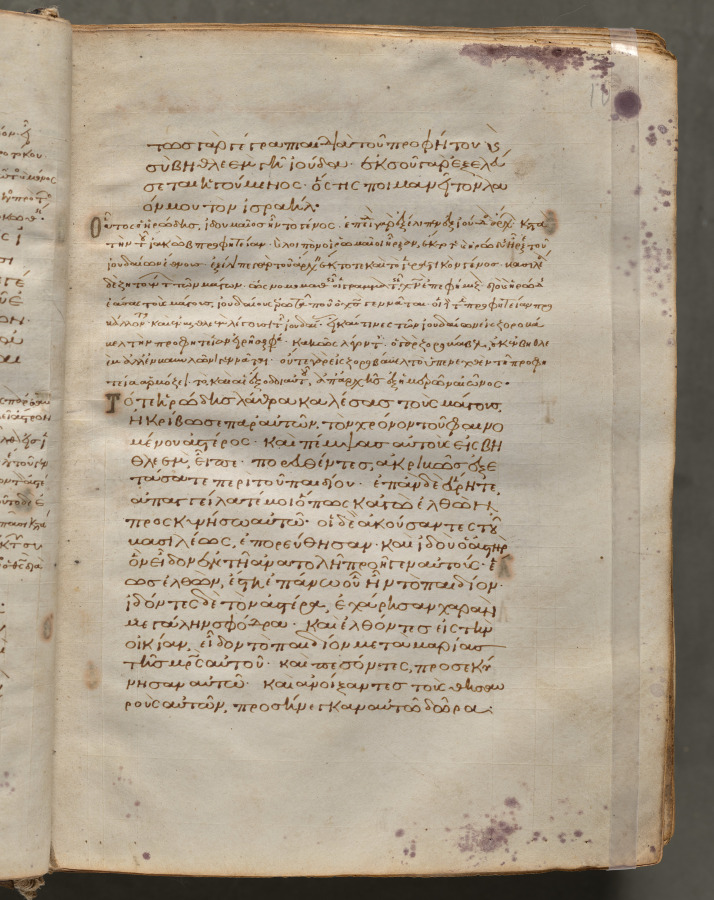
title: Text, folio 10 (recto), from a Gospel Book with Commentaries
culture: Byzantium, Constantinople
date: c. 1000–1100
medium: ink, tempera, and gold on vellum; leather binding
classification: Bound Volume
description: Each of the four gospels in this book opens on a page with brilliantly illuminated borders depicting the author of the text as well as birds-principally peacocks, symbols of the immortality of the soul-and fountains, representing the fountain of life and the salvation of the soul. This volume consists of 428 leaves with texts in Greek. Its level of sophistication suggests that it was probably written and decorated in a monastery in Constantinople.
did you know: Gospel Books were carried in procession through Byzantine churches.